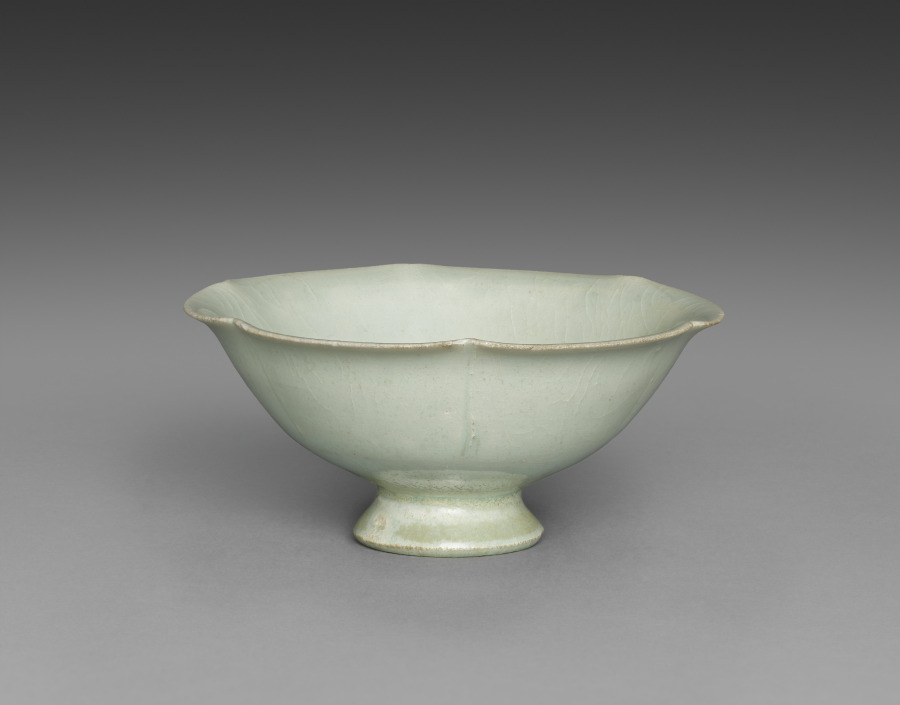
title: Cup and Stand (Cup)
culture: China, Jiangxi Province, Jingdezhen, Southern Song dynasty (1127–1279)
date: 1100s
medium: Porcelain with pale bluish-white glaze, qingbai ("blue-white") ware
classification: Ceramic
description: The kilns of Jingdezhen in Jiangxi province produced an extremely delicate porcelain made from the local resources of kaolin (white China clay) and petuntse (a feldspathic rock called china stone). It is glazed with a clear bluish-white glaze, thus the name qingbai (blue-white) or yingqing (shadowy blue) for this type of ware.